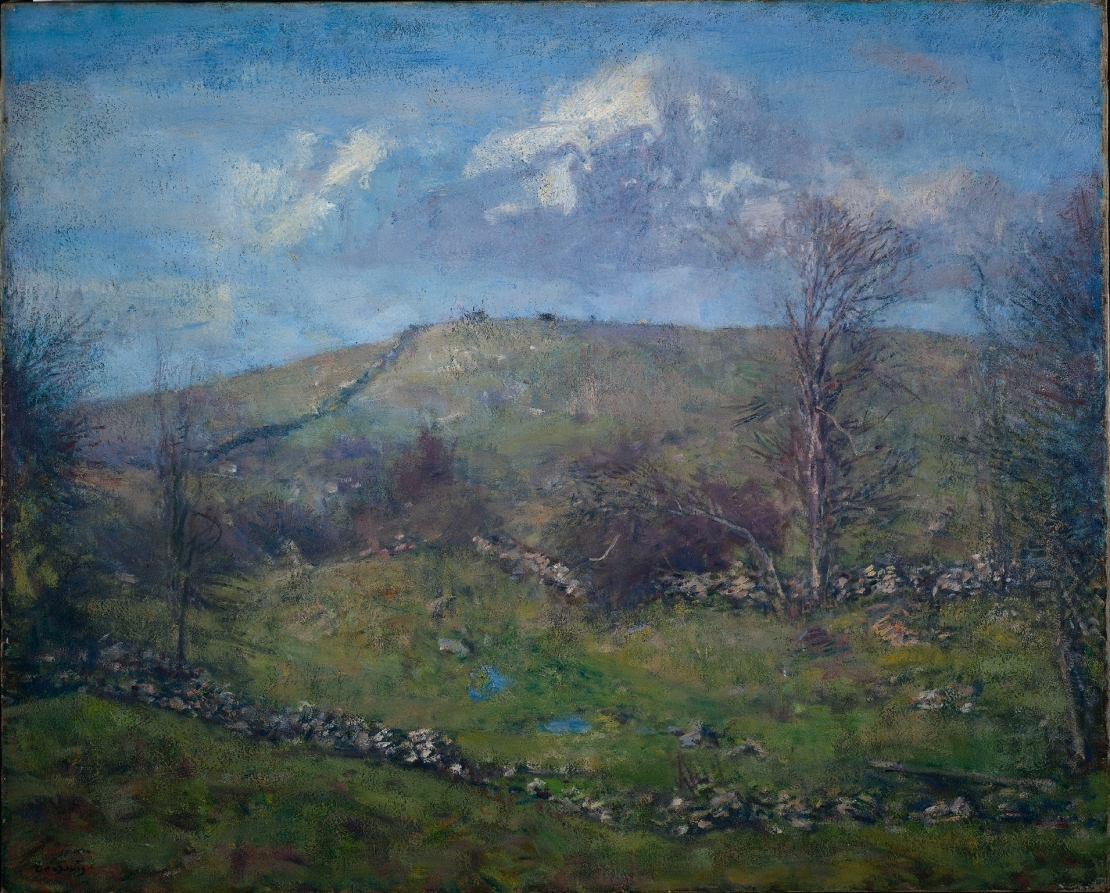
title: Spring on the Hillside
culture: America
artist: Charles Harold Davis (American, 1856–1933)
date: c. 1920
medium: oil on canvas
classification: Painting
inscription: Signed lower left: "C.H. DAVIS"